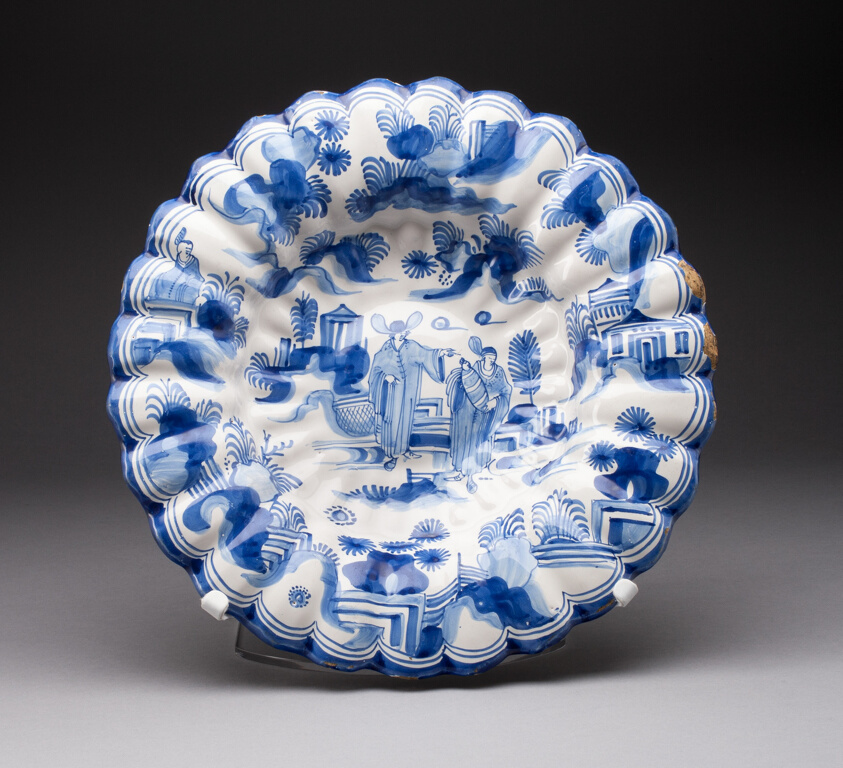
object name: Ceramics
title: Plate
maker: Germany, Hanau or Frankfurt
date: 1680/1700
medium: Tin-glazed earthenware (faience)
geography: Hanau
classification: plate (general, dish); dish (vessel); european decorative arts; ceramics